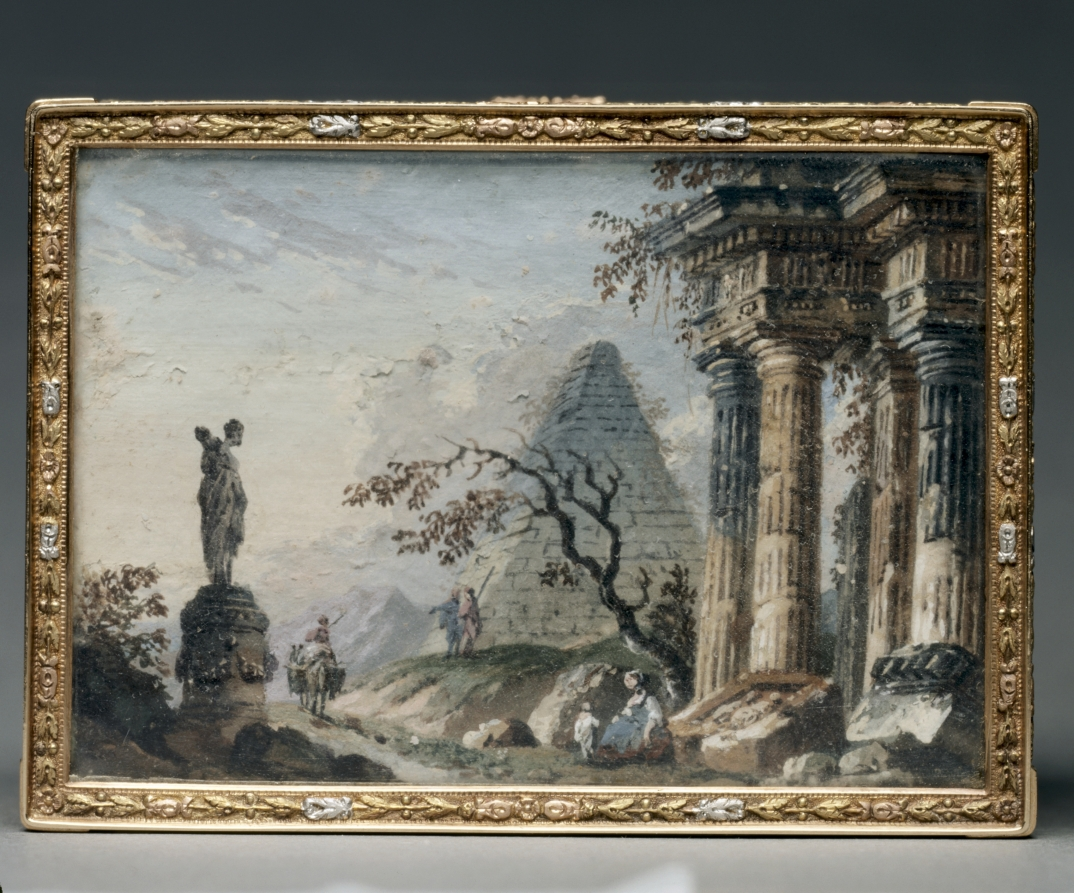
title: Rectangular Box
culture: France, 19th century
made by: Alexandre Leferre (French)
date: c. 1840–1850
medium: gouache miniatures mounted on gold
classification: Miscellaneous